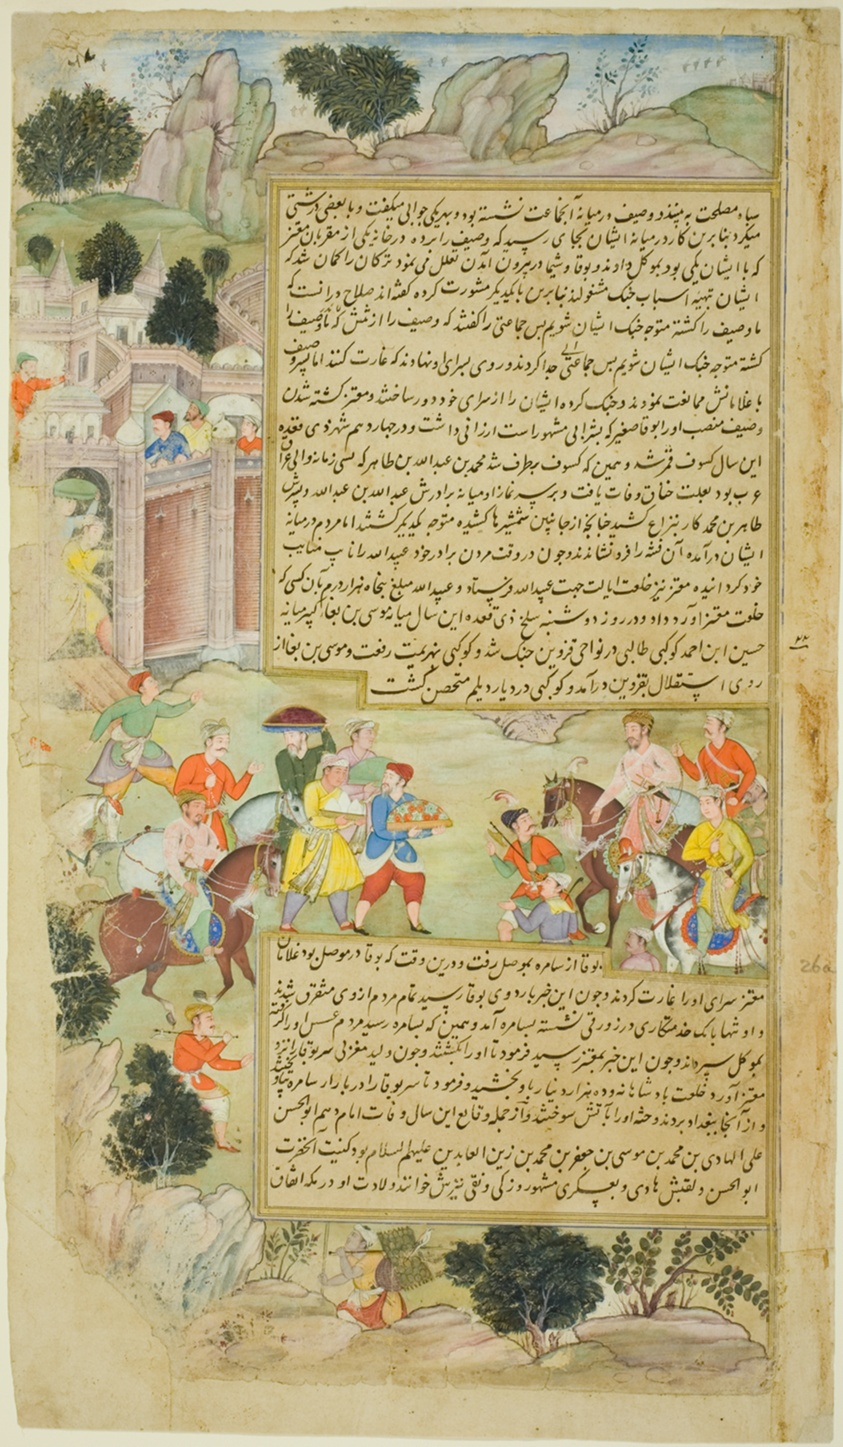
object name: Painting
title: Al-Mu'tazz Sends Gifts to Abdulla ibn Abdulla, from a copy of the Tarikh-i Alfi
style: South Asian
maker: India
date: c. 1592-1594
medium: Opaque watercolor and gold on paper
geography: India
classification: miniature painting; painting; asian art